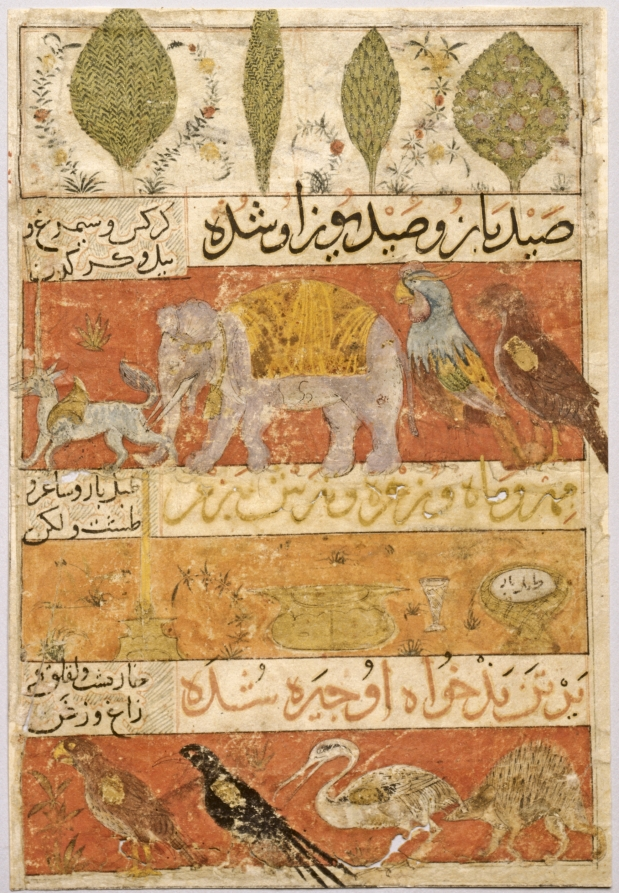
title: Animals, Birds, and Plants (verso) from a Mu'nis al-Ahrar fi Daqa'iq al-Ash'ar (The Free Men's Companion to the Subtleties of Poems) of Muhammad Ibn Badr al-Din Jajarmi (active 1340s)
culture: Iran, Shiraz, Ilkhanid period (1256-1353)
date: c. 1341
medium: opaque watercolor, ink, and gold on paper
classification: Manuscript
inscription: script: Thulth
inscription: Making the garden of his pleasure their homeland are:/ Rosebush and box-tree, cypress and elm./ Prey to hawk and prey to his cheetah are:/ Vulture and sīmurgh, elephant and rhinoceros./ Sun and Moon, Venus and Mercury are at his feast:/ Falcon-drum and goblet, bowl and candlestick./ Overwhelming the corpses of his foes are:/ Porcupine and stork, raven and kite.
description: This is one of several pages that were removed from a unique manuscript of this otherwise unknown work, which bears a colophon stating that it was written by the author and finished "Ramadan, 741" (February 1341). Illustrations on both sides include various animals, trees, and objects such as weapons, musical instruments, and jewels.